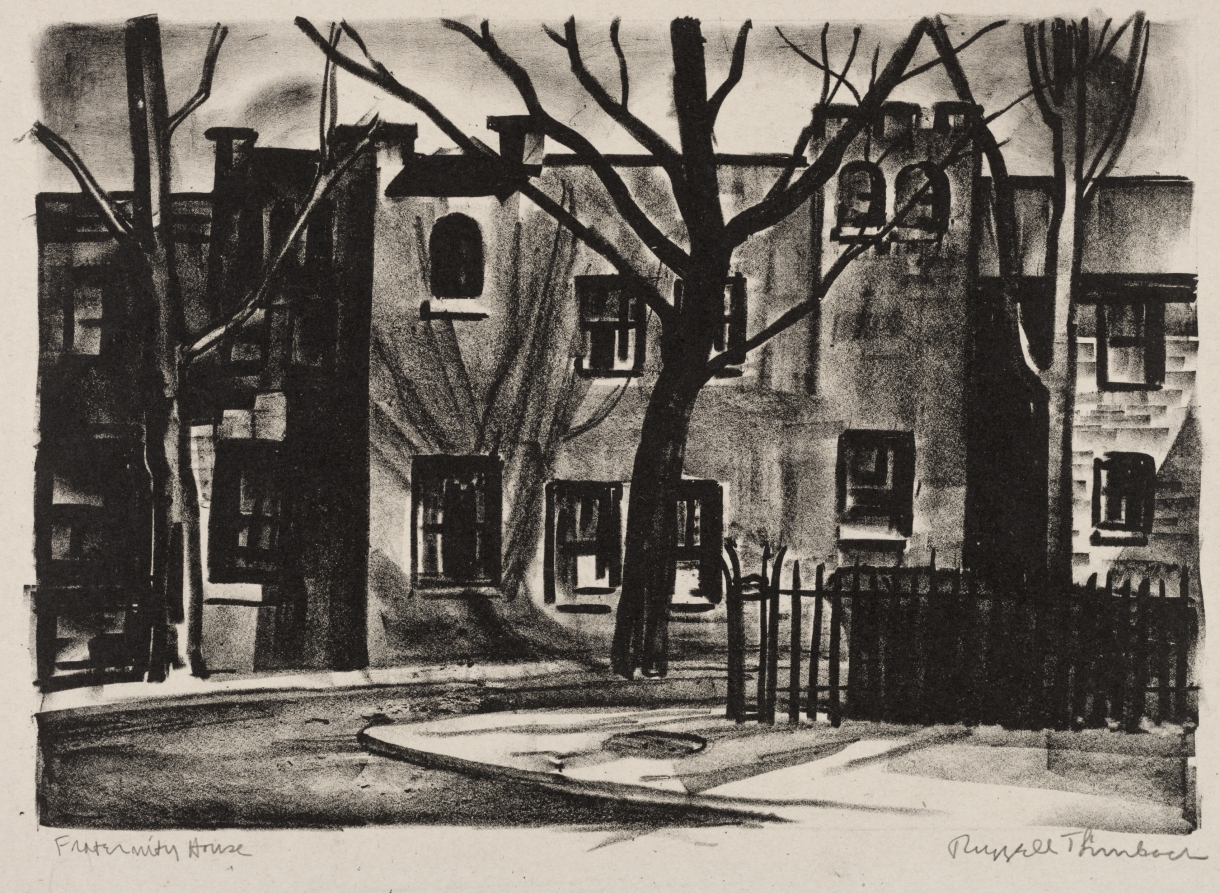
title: The Fraternity House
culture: America, Ohio, Cleveland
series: 2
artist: Russell T. Limbach (American, 1904–1971)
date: c. 1928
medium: lithograph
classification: Print